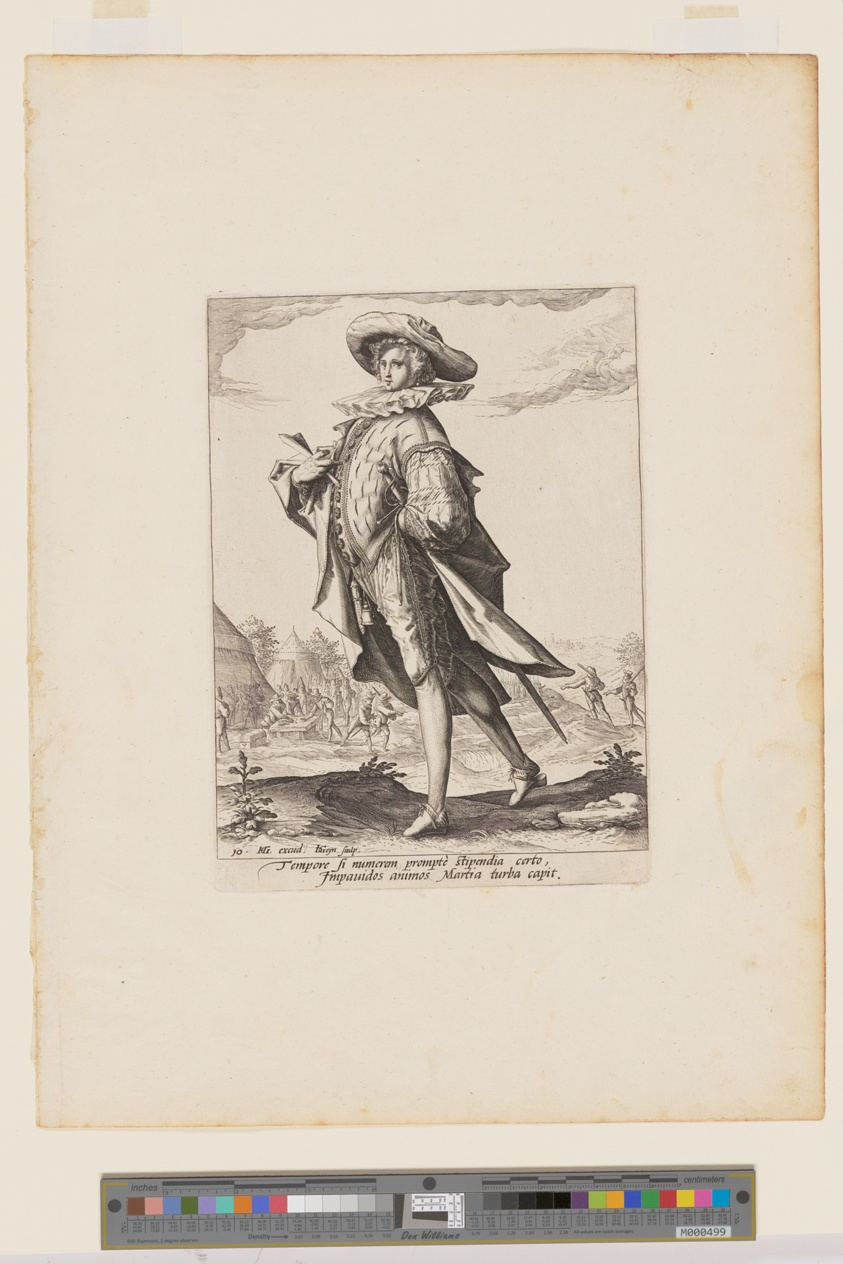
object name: Print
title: Treasurer, from Officers and Soldiers of the Bodyguard of Emperor Rudolph II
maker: Jacques de Gheyn II (Dutch, 1565–1629); after Hendrick Goltzius (Dutch, 1558–1617)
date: 1587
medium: Engraving on ivory laid paper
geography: Netherlands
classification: engraving; paper; print; prints and drawing